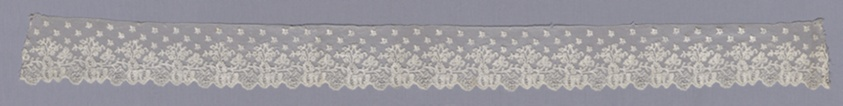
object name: Textile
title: Border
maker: Belgium, Flanders, Mechlin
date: c. 1820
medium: Cotton and linen, bobbin straight lace of a type known as "Mechlin" with a Mechlin mesh ground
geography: Flanders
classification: textile; lace - bobbin; lace